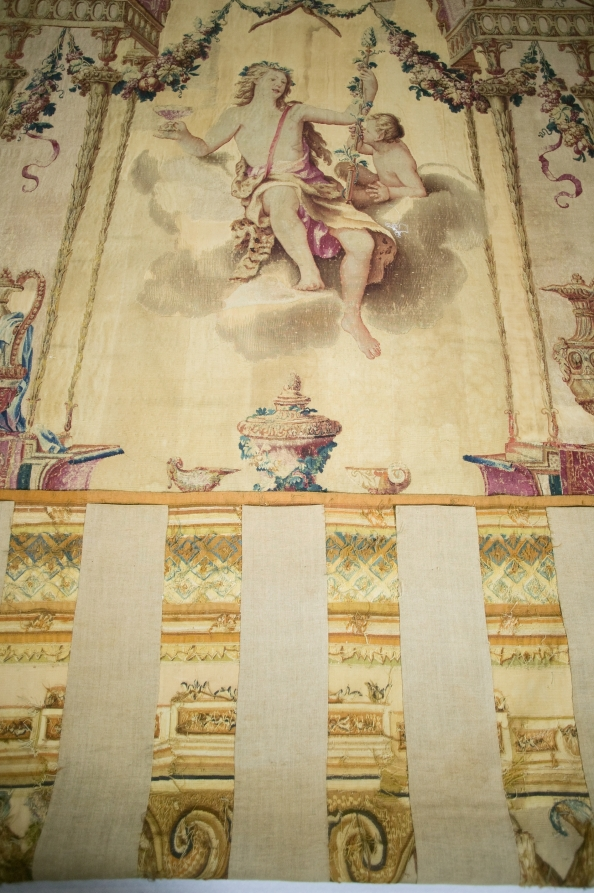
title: Seasons: Autumn, Bacchus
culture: France, 18th century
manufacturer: Gobelins Manufactory (France, Paris, est. 1662)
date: 1700s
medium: tapestry weave; silk, wool, cotton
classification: Tapestry